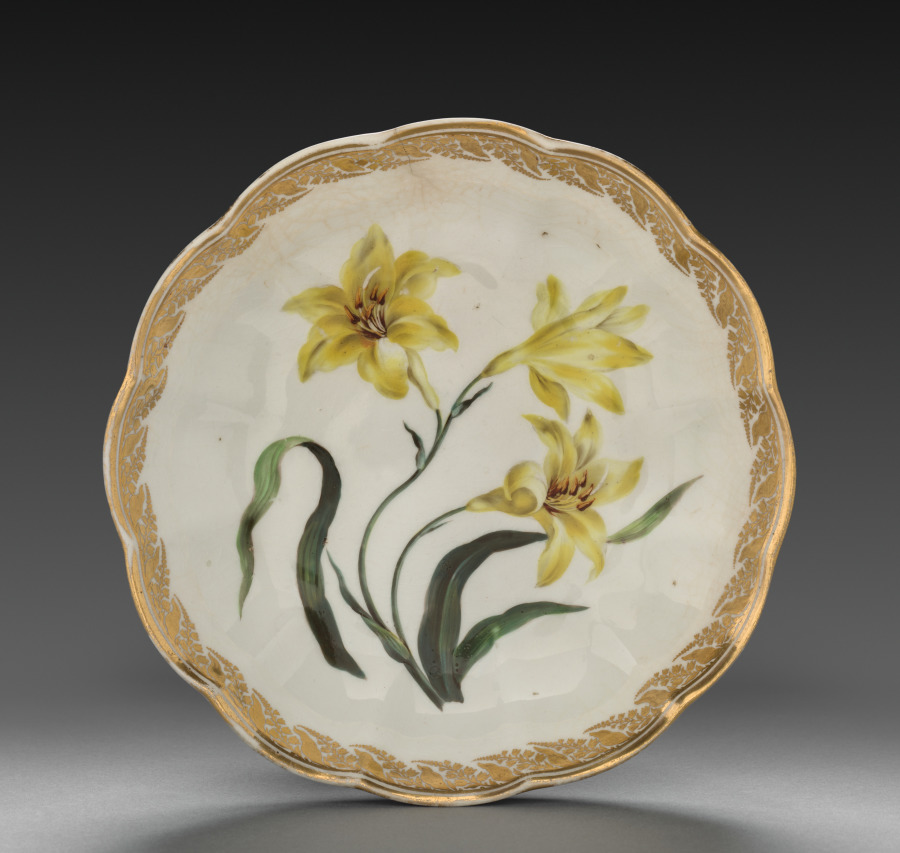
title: Bowl from Dessert Service: Smaller Yellow Lily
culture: England, Derby, 18th century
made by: Derby (Crown Derby Period) (British)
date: c. 1800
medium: porcelain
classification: Ceramic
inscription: inscribed in blue on back: Lilium Aurantiacum. Smaller Yellow Lily./crown/crossed batons and dots/D/115. Near edge: 9.